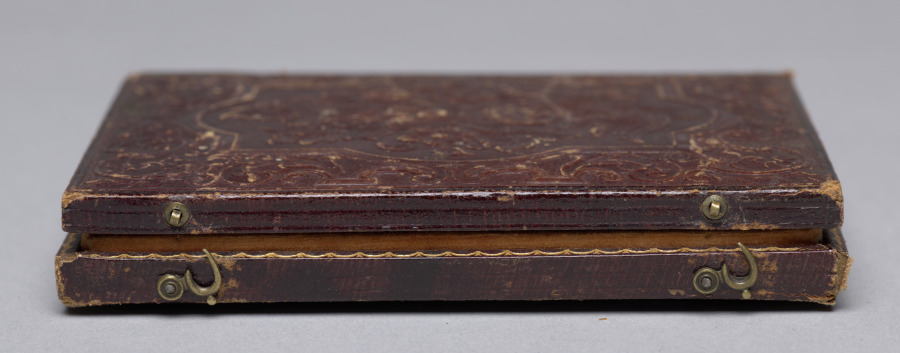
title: Prize Horse in winter, Chemung County, New York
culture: America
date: c. 1852–56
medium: daguerreotype, quarter plate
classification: Photograph